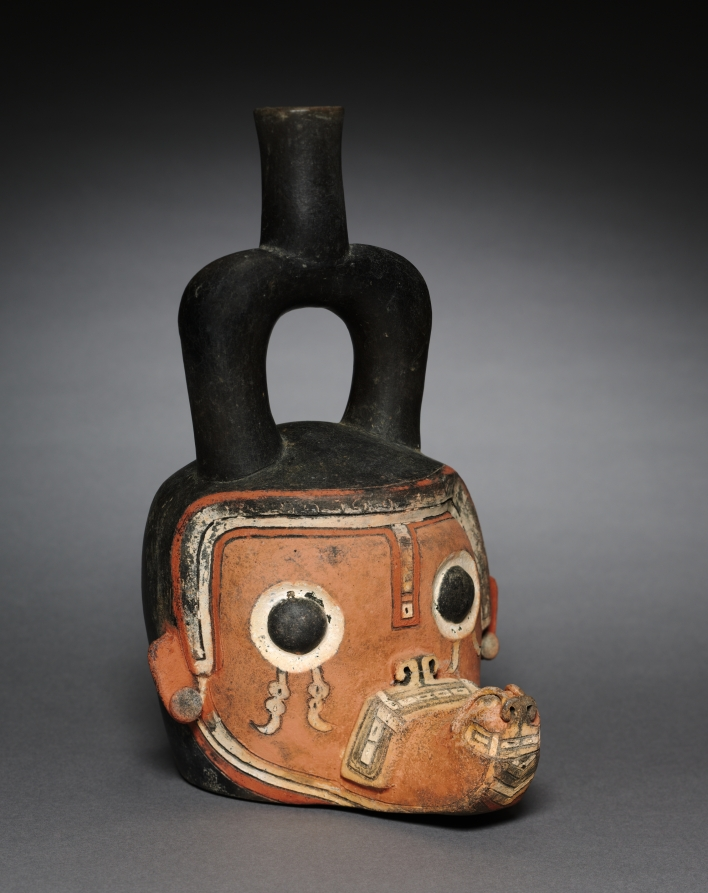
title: Deity-Head Vessel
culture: Peru, North Coast, Tembladera people, Early Horizon (900-400 BCE)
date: 900–400 BCE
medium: ceramic with pigment applied after firing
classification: Sculpture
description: This is a stirrup-spouted vessel shaped as the effigy of a deity head with bulging, circular eyes from which hang pendants. A fanged, bandlike mouth is arranged horizontally on top of a projecting chin that is tipped with a three-dimensional, zoomorphic head. A chin strap reaches between two modeled knobs that double as ear ornaments, and the underpart of the chin is ornamented with chevrons. The face is painted red, yellow, and white over the burnished gray-black surface of the ceramic.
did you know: The Tembladera style is one of several very early styles that developed on the northern desert coast of Peru.